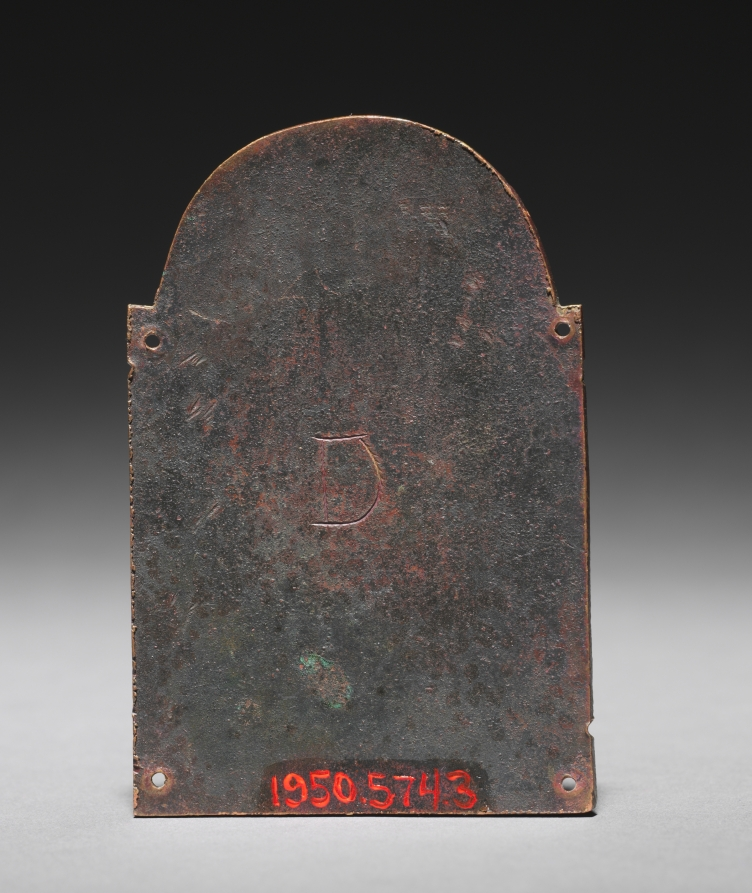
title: Plaque with Seated Prophet from a Reliquary Shrine: Achapias (Obadiah)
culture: Germany, Lower Saxony, Hildesheim, Romanesque period, 12th century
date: c. 1170–80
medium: gilded copper, champlevé enamel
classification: Enamel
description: Once used as decorations for a reliquary shrine, each enamel plaque represents a biblical prophet: Isaiah, Obadiah, Elisha, and Hosea. Fine gold dots punctuate dark blue backgrounds. Typical of Hildesheim enamels, this detailing creates the illusion that the prophets sit against star-studded twilight skies.